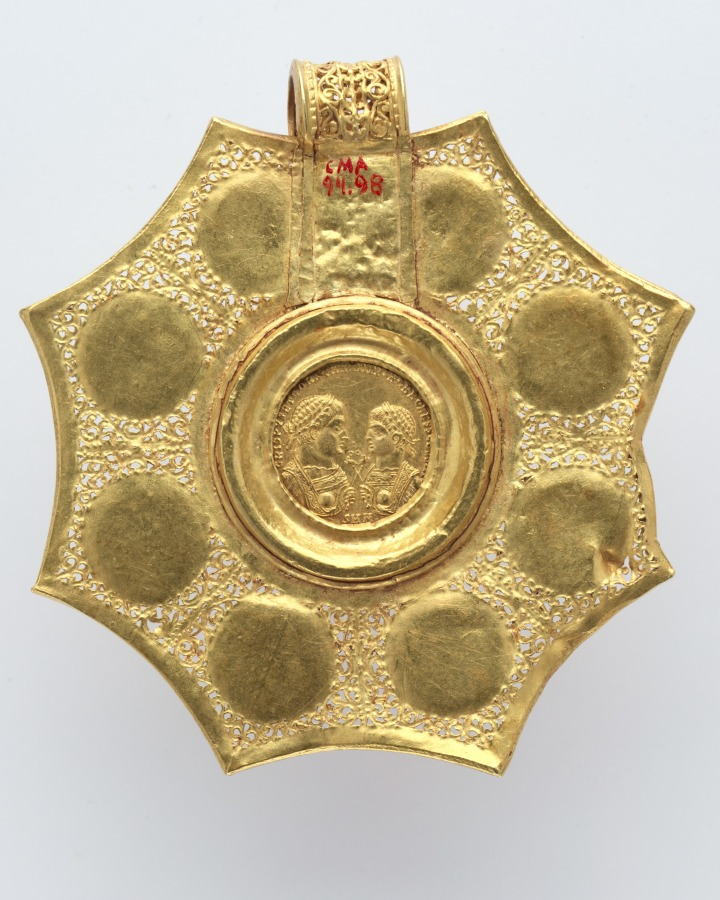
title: Octagonal Pendant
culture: Byzantium, Late Roman, Eastern Mediterranean, (probably Sirium or Nicomedia), Byzantine period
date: 324–26 CE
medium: gold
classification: Jewelry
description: Mounted at the center of this octagonal pendant is a rare coin issued by Constantine the Great, the Roman Empire’s first Christian emperor. Constantine’s portrait appears on the coin’s front, those of two of his sons on the back. Constantine’s image is surrounded by male and female busts, some of which are mythological figures. The pendant once formed the centerpiece of a sumptuous gold necklace, likely a gift for a high-ranking court official or member of the imperial family.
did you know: Precious Byzantine coins, such as the one in this pendant, were mounted as jewelry and bestowed upon court officials as a special honor. They signified loyalty to the emperor and were often passed down as family heirlooms. Does your family have special objects that have been preserved from generation to generation?